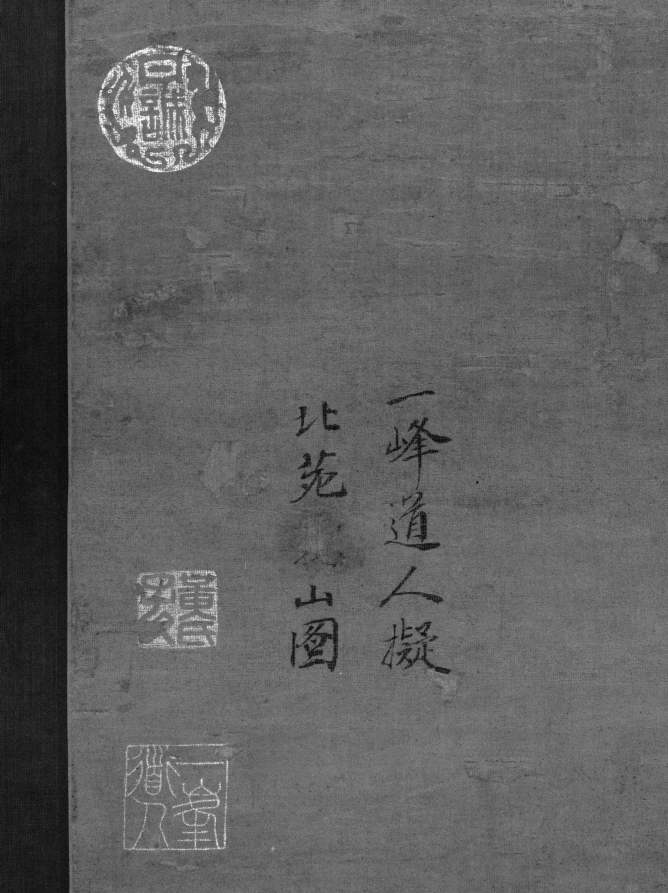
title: Summer Mountains (after Dong Yuan [active c. 937–75])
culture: China, Yuan dynasty (1271-1368)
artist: attributed to Huang Gongwang (Chinese, 1269–1354)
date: 1290–1354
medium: hanging scroll; ink and slight color on silk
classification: Painting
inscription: 【印】一峰道人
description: This monumental landscape is drawn in softly rounded strokes with darker lines frequently applied on top of lighter ones. This technique recalls one of the suggestions included in a collection of the artist's writings known as Secrets of Landscape Painting: The most difficult thing in painting is using the ink. The artist begins by using dilute ink and builds it up to the point where it begins to look right, then uses dense, black ink, applied fairly dry, and washes of deeper-toned ink. This technique distinguishes the fields from the paths, the far from the near. Huang Gongwang may have learned this technique from observing nature through the eyes of an earlier master, Dong Yuan, a painter whose style he shared.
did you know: The wet hills and moist, rich atmosphere evoke the southern Chinese summer, characterized by monsoon rains and lush growth.